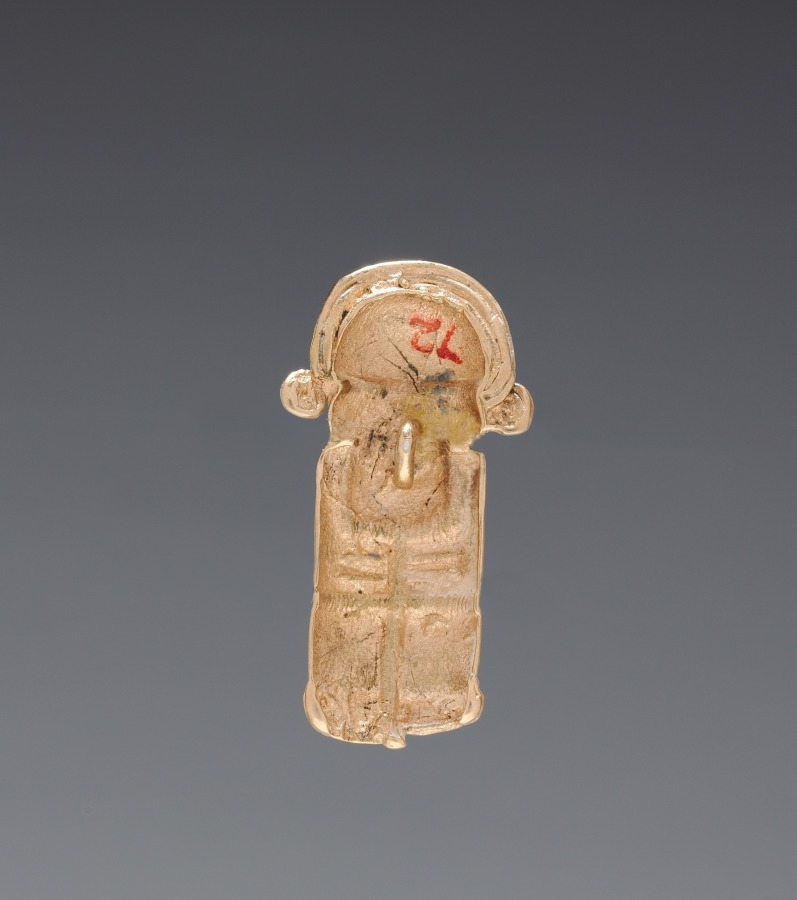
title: Necklace Figurine Bead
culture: Colombia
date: 1–700 CE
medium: cast gold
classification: Jewelry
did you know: Working with gold dates back to at least 500 BC in Ecuador and Colombia.